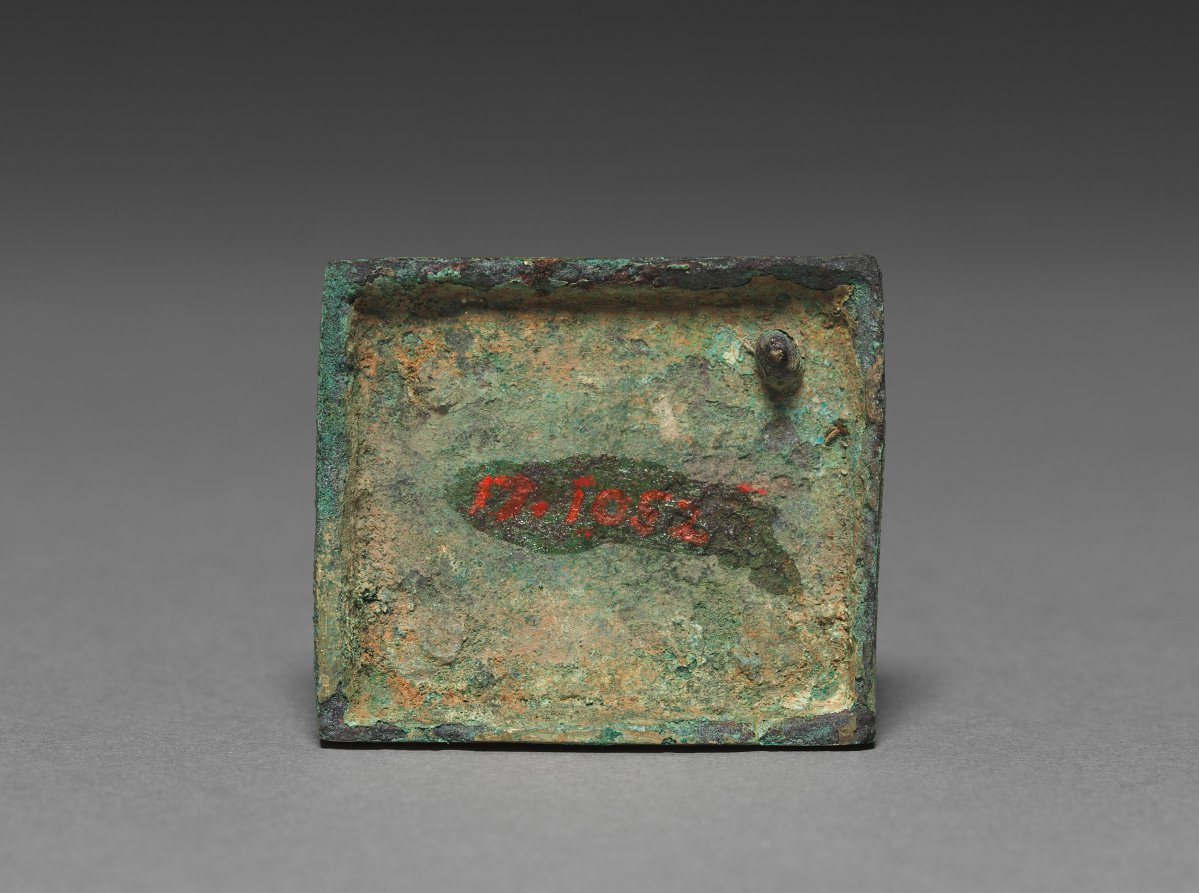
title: Belt Ornament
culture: Korea, Goryeo dynasty (918–1392)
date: 918–1392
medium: bronze gilt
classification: Metalwork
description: Metallurgy advanced remarkably in the Goryeo period (918-1392), explaining why a large quantity of sophisticated metal artifacts with delicate designs were used not only as daily accessories but also as burial goods. Belt ornaments like this example were fixed to leather belts.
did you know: The Japanese antique dealer Yamanaka & Company, which opened its branches in New York (1895) and Boston (1899) sold small Korean archaeological materials such as this belt ornament to American collectors in the early 20th century.